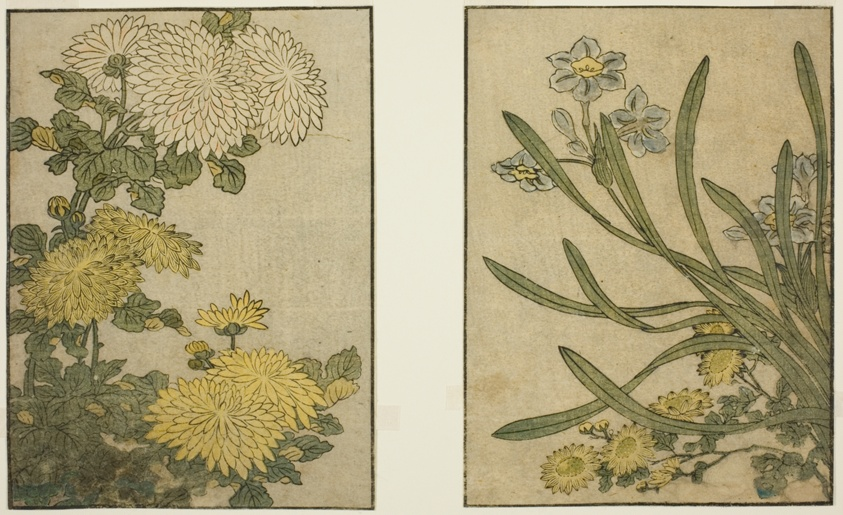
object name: Print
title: Chrysanthemum and Narcissus, from the illustrated book "Picture Book: Flowers of the Four Seasons (Ehon shiki no hana)," vol. 2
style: Japanese (culture or style)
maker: Kitagawa Utamaro 喜多川 歌麿; Japanese, 1753 (?)-1806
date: New Year, 1801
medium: Color woodblock print; 2 pages from illustrated book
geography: Japan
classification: woodblock print; print; asian art